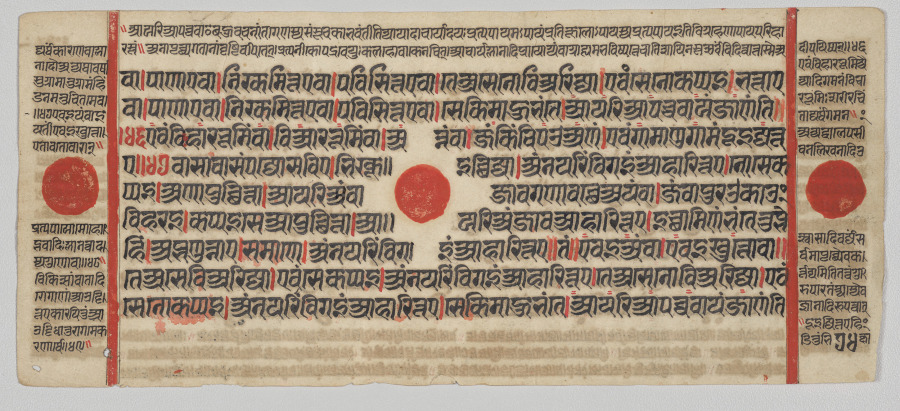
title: Text, Folio 74 (verso), from a Kalpa-sutra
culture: Western India, Gujarat, last quarter of the 15th century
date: c. 1475–1500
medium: Gum tempera, ink, and gold on paper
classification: Painting